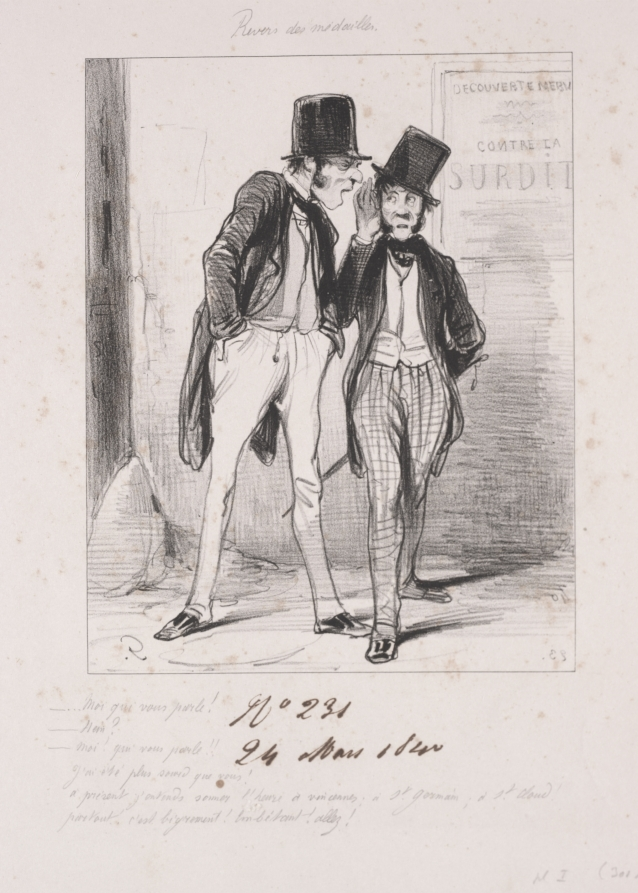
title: Revers des médailles: Moi qui vous parle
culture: France, 19th century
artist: Paul Gavarni (French, 1804–1866)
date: 1840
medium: lithograph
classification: Print